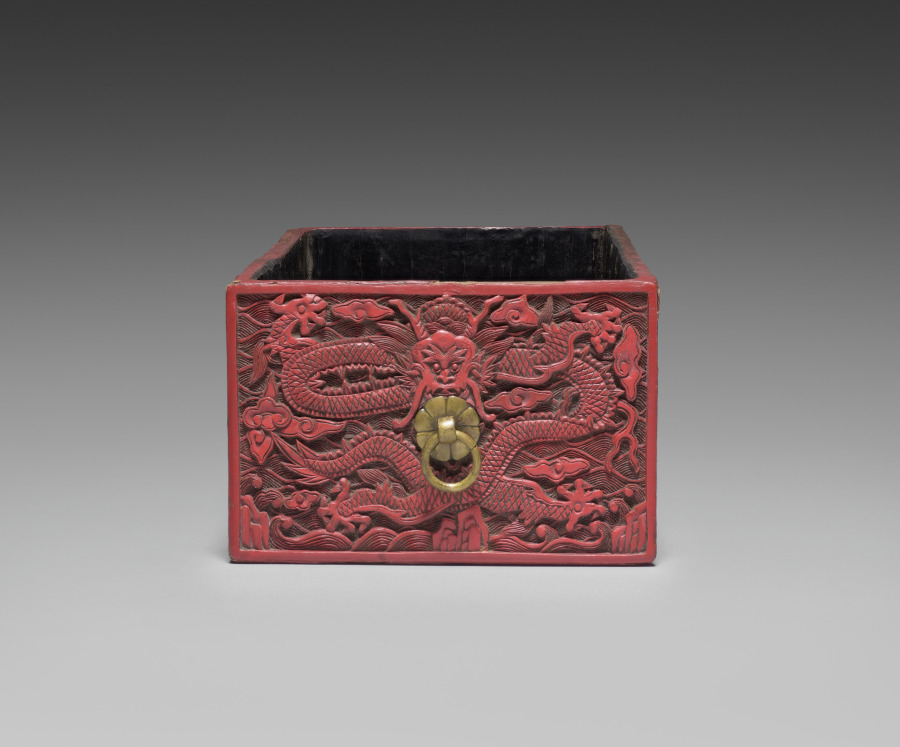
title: Drawer for a Tihong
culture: China, Ming dynasty (1368-1644), Wanli reign (1572-1620)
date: 1585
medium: carved cinnabar lacquer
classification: Lacquer